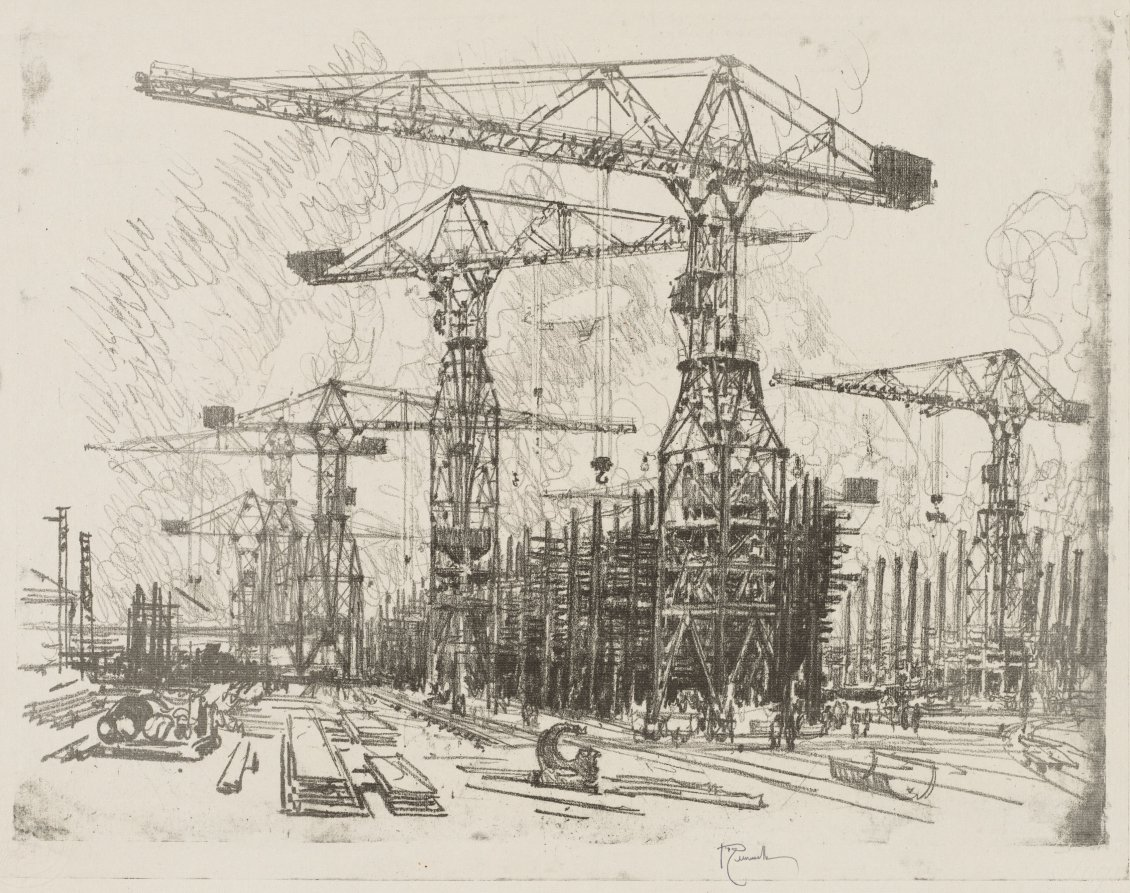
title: English War Work: The Old Shipyard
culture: America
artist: Joseph Pennell (American, 1857–1926)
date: 1916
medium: lithograph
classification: Print